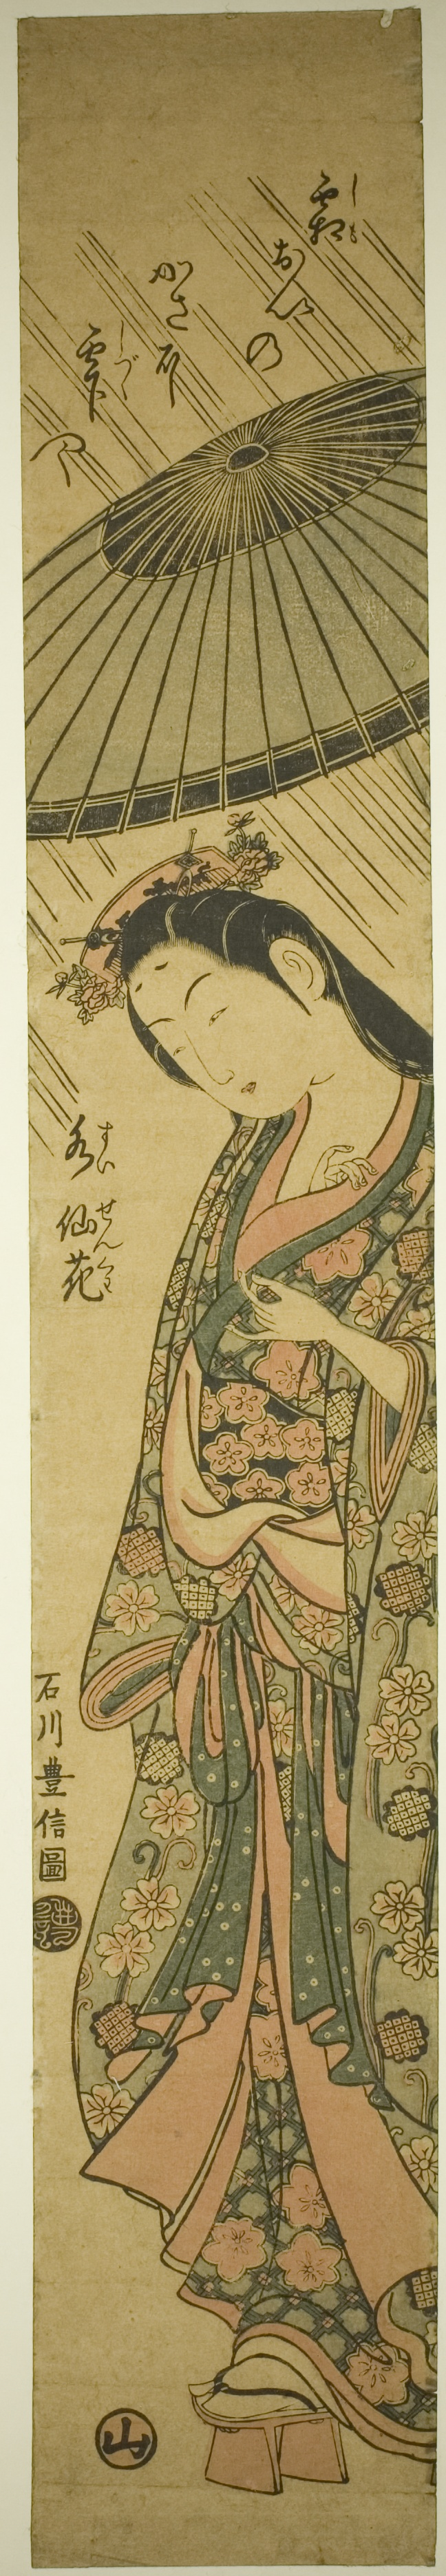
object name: Print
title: Praying for Rain Komachi (Amagoi Komachi)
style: Japanese (culture or style)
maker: Ishikawa Toyonobu (Japanese, 1711-1785)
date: Edo period (1615–1868), about 1755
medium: Color woodblock print (benizuri-e); hashira-e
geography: Japan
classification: woodblock print; print; asian art